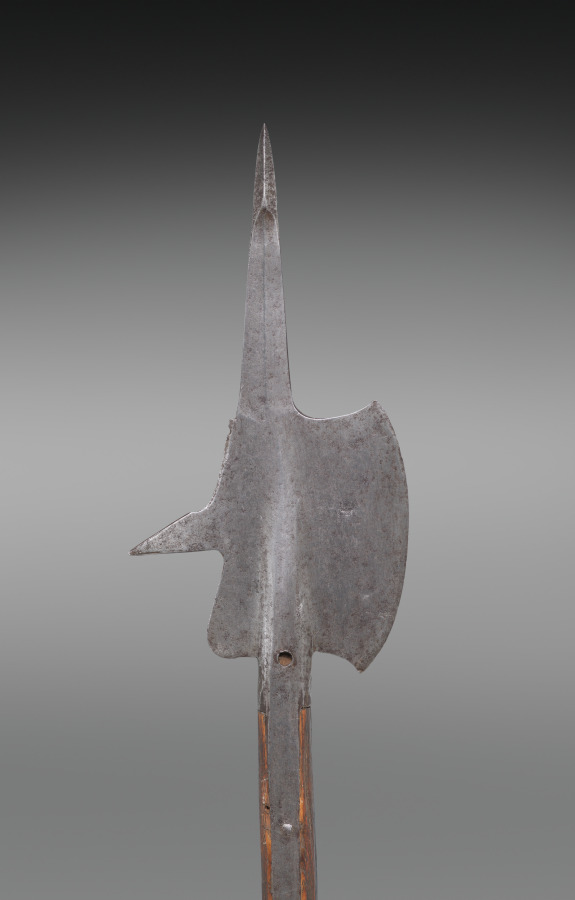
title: Halberd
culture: Switzerland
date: 1600s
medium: steel; new rectangular wood haft with planed corners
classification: Arms and Armor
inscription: IP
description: The halberd was a staff weapon favored by European infantries (foot soldiers) of the 1400s and 1500s for its versatility and deadly effect. The word halberd comes from the German words Halm (staff) and Barte (axe). The halberd is, in fact, an axe that served multiple functions: the axe blade was used for hacking, the spike for thrusting, and the beak for piercing plate armor or for pulling a knight from his saddle. The halberd was used by shock troops (those who lead an attack) and by Swiss and German mercenaries. After about 1550, the halberd gradually became less functional. Its large blade provided space for coats of arms and insignia. By the late 1500s, the parade halberd had become a ceremonial weapon for palace guards.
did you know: The earliest known mention of the halberd is believed to be by the Swiss poet Konrad von Würzburg (d. 1287) who wrote about them in his History of the Trojan War.